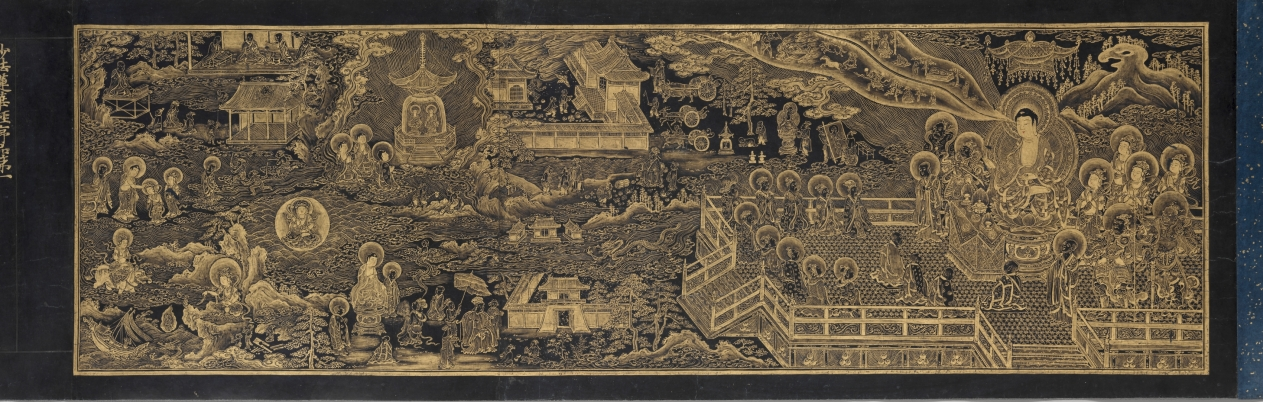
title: Lotus Sutra with a Frontispiece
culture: China, Song dynasty (960–1279)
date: late 1100s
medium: handscroll; gold ink on indigo sutra paper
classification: Painting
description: The frontispiece of this sutra, a sacred Buddhist scripture, illustrates episodes mentioned in the Buddha’s teaching. The sutra begins with a description of the historic Buddha Shakyamuni’s assembly on Vulture Peak. On the right, the Buddha sits amid members of his congregation: lohans (or arhats), bodhisattvas, gods, and other beings. The narrative proceeds from right to left. Heavenly light emanates from Shakyamuni’s brow to “illuminate the eighteen thousand worlds to the east.” Illustrated immediately below the ray is the sutra’s promise that if anyone carves or paints images of the Buddha “they will achieve the Buddha path.” The female figures in the frontispiece point to another promise made in this popular Mahayana school sutra, namely that female devotees and nuns who read the sutra are promised Buddhahood and salvation.